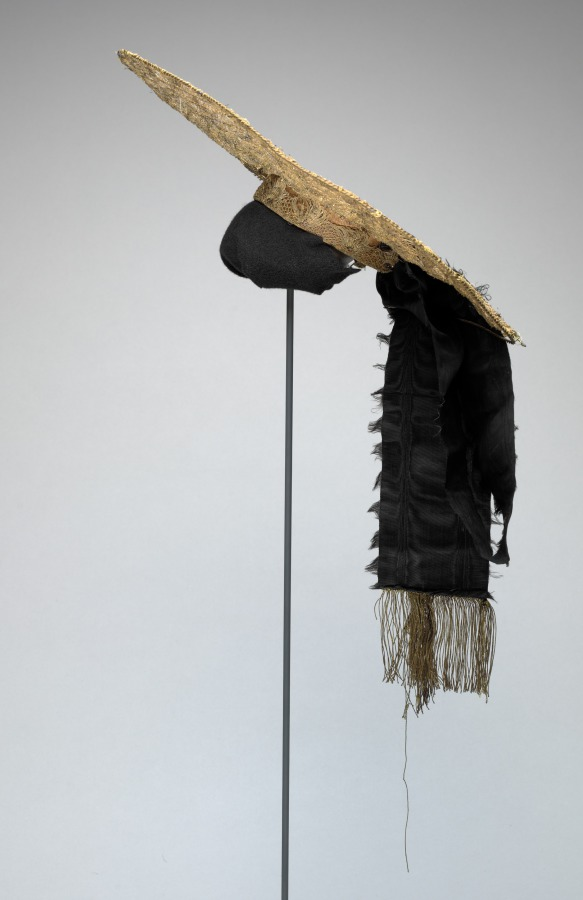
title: Bonnet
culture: Germany, Early 20th Century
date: early 1900s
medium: lace, wire, tinsel, moire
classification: Garment